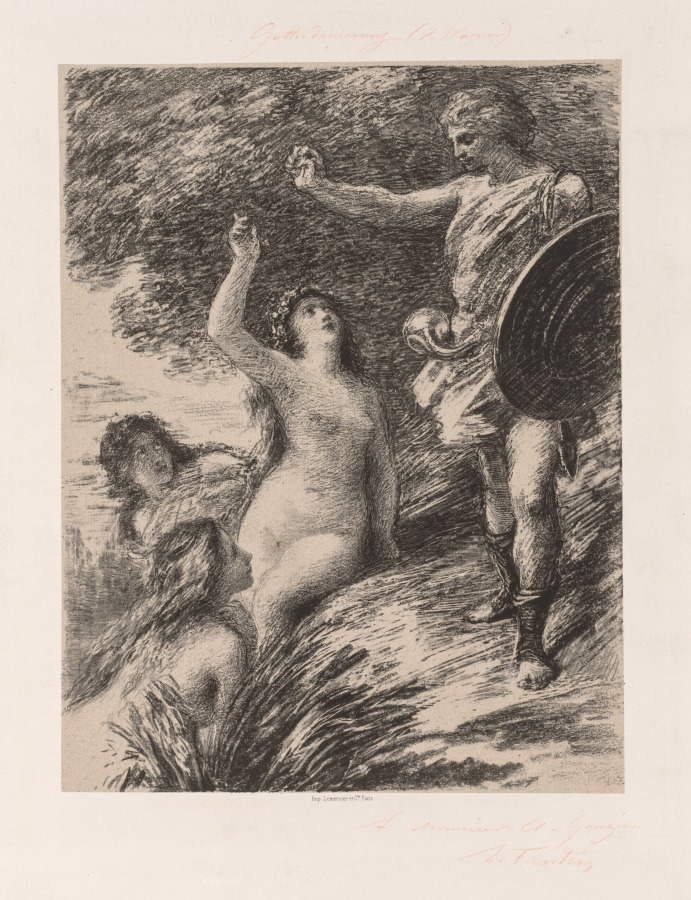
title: Siegfried and the Daughters of the Rhine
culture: France, 19th century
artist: Henri Fantin-Latour (French, 1836–1904)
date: c. 1880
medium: lithograph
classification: Print